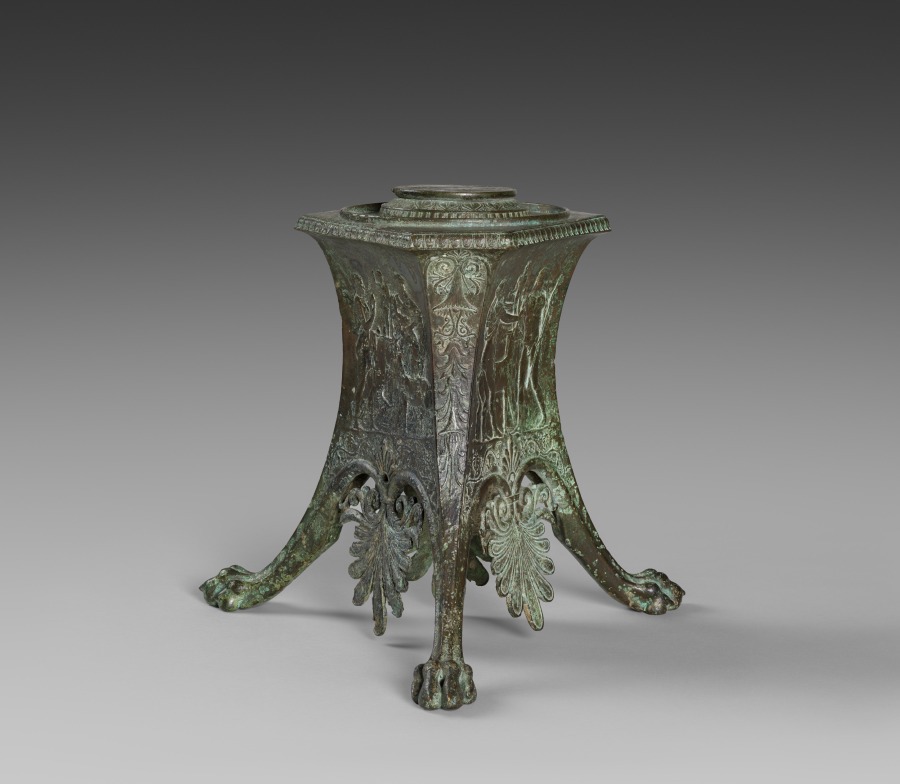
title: Tripod Base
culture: Italy, Roman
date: 100–1 BCE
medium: bronze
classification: Sculpture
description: This unusual tripod base features three clawed feet, an abundance of vegetal ornament, and three different figural scenes in low relief. Two seem to show sanctuary settings: first, a small Archaistic statue of Athena flanked by a woman with small offerings and a man holding a kid and leading two goats; and second, a small youthful male statue behind two beardless figures—perhaps Apollo, with a stag, and Dionysos, holding a thyrsos. The third scene shows Herakles, holding a club while leading a woman, maybe Auge or Alcestis. Although perhaps similarly eclectic in style, the base and the sculpture it now supports differ in their alloys and patinas.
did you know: This elaborate base may have originally supported an ornate lamp (not the statuette now displayed atop it).